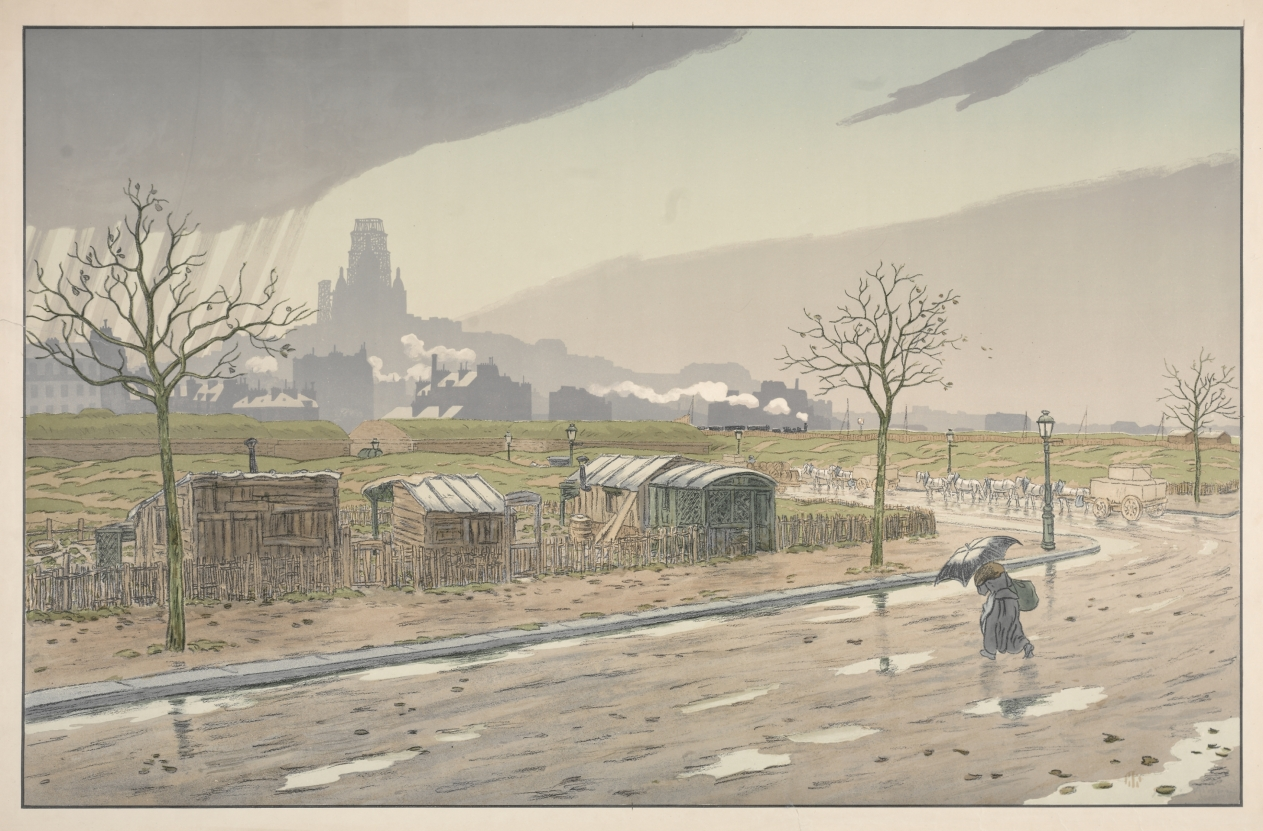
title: Parisian Landscapes: The Fortifications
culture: France, early 20th century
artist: Henri Rivière (French, 1864–1951)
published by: Printed by Verneau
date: 1900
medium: color lithograph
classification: Print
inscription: lower margin, in graphite: inscription; lower edge in graphite: publisher's information